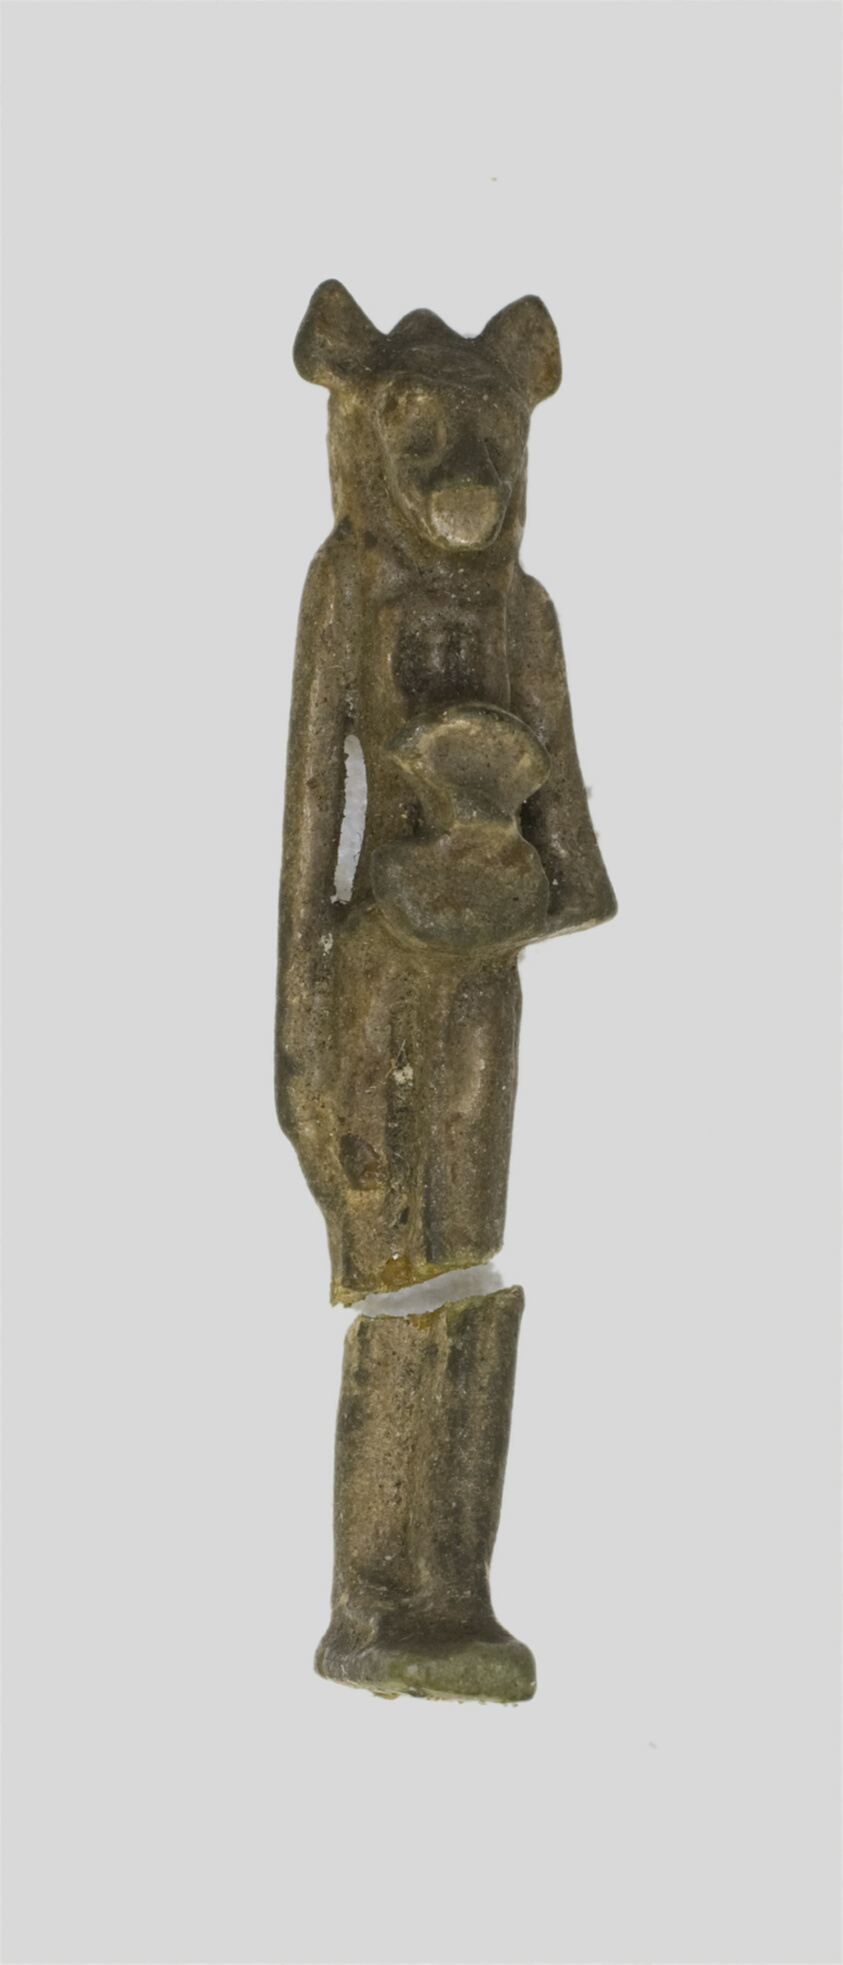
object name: Costume and Accessories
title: Amulet of a Lion-headed Goddess Holding an Aegis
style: roman period (egyptian), greco-roman (egyptian)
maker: Egyptian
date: Late Period–Ptolemaic Period (?) (7th–1st century BCE)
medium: Faience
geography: Egypt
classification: amulet; jewelry; ceramics; ancient art; costume; faïence (composite material)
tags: goddesses